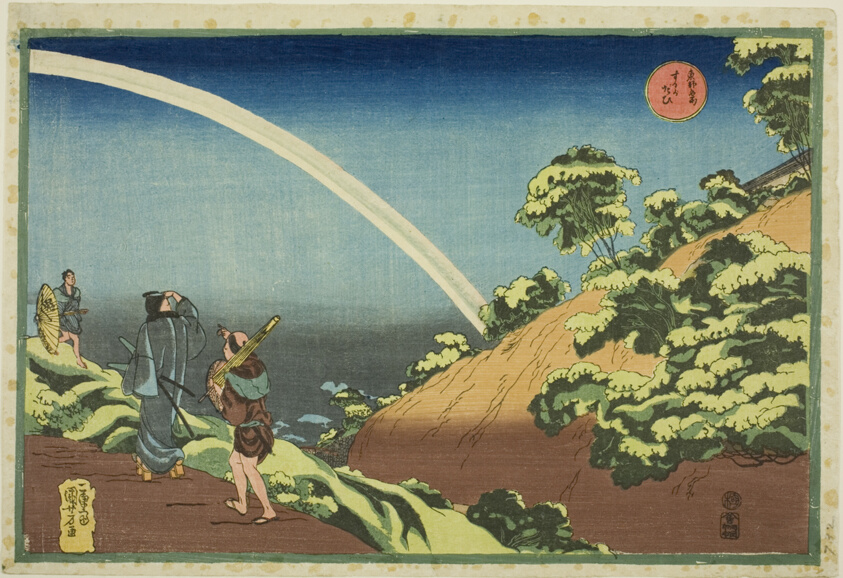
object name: Print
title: Surugadai, from the series "Famous Places in the Eastern Capital (Toto Meisho)"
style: Japanese (culture or style)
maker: Utagawa Kuniyoshi (Japanese, 1797-1861)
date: c. 1832/33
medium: Color woodblock print; oban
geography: Japan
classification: woodblock print; print; asian art